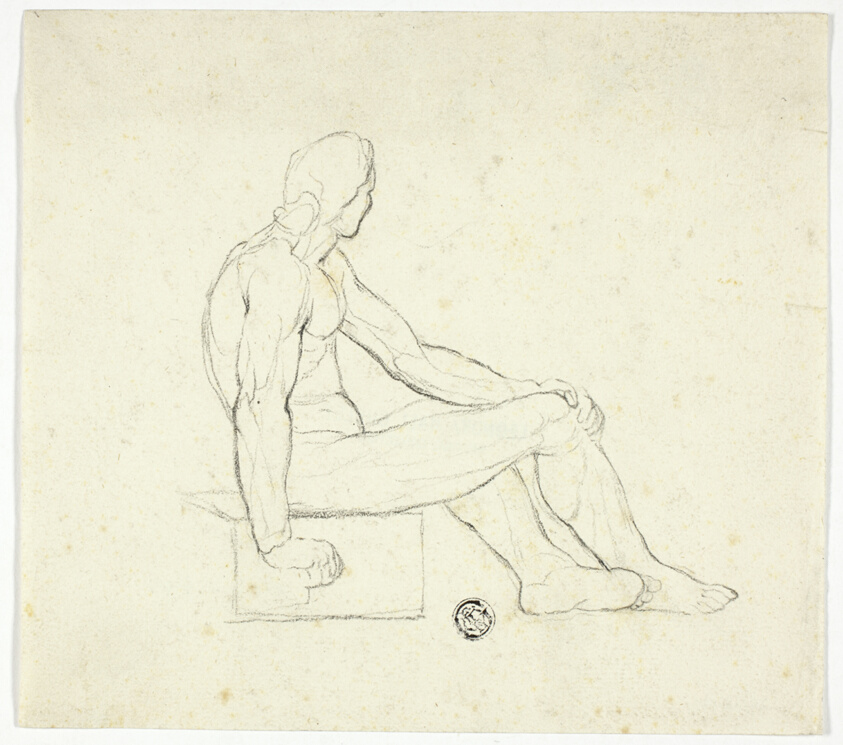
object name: Drawing and Watercolor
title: Seated Male Nude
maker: Style of Jacques Louis David (French, 1748-1825)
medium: Black chalk on ivory laid paper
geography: France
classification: charcoal; drawings (visual works); prints and drawing